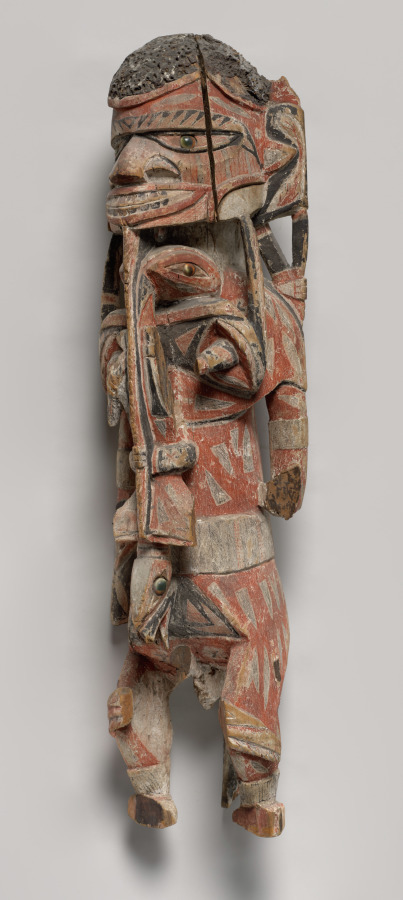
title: Malagan Memorial Festival Pole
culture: Melanesia, New Ireland, 19th century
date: 1800s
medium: painted wood, sea snail opercula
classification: Sculpture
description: At the death of an important individual in New Ireland society, villagers begin preparations for an elaborate funeral (malagan) ceremony. Food is collected for feasts, and artists are commissioned to carve elaborate sculptures and masks. Neighboring groups are invited to the ceremonies, which last for days and include speeches, dancing, music, feasts, and exchanges of goods. The ceremonies climax in the display of the elaborately carved, brightly painted art works. After the guests' departure, the malagan sculptures and masks are discarded, or sometimes stored.